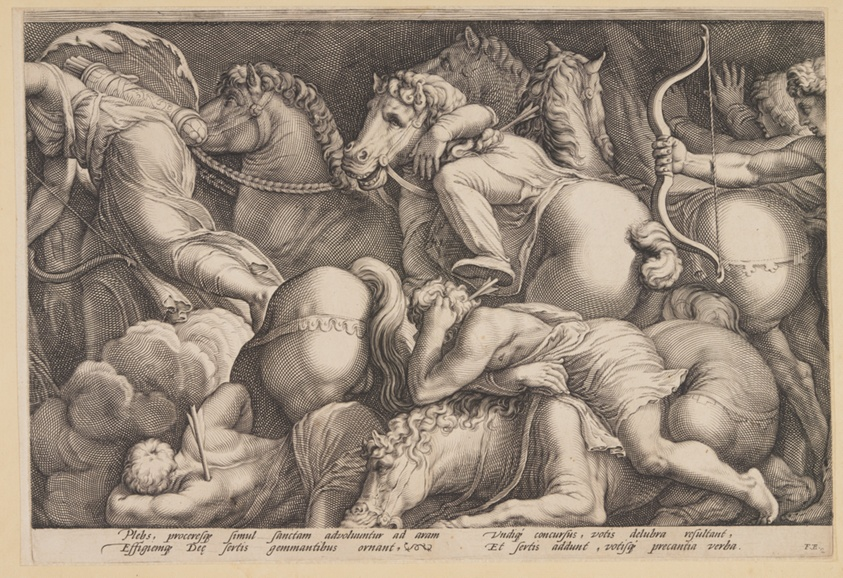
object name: Print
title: The Punishment of Niobe (Plate 2)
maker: Jan Saenredam (Dutch, 1565–1607); after Polidoro da Caravaggio (Italian, c. 1499–c. 1543)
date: 1594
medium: Engraving on ivory laid paper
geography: Netherlands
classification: print; paper; prints and drawing; engraving